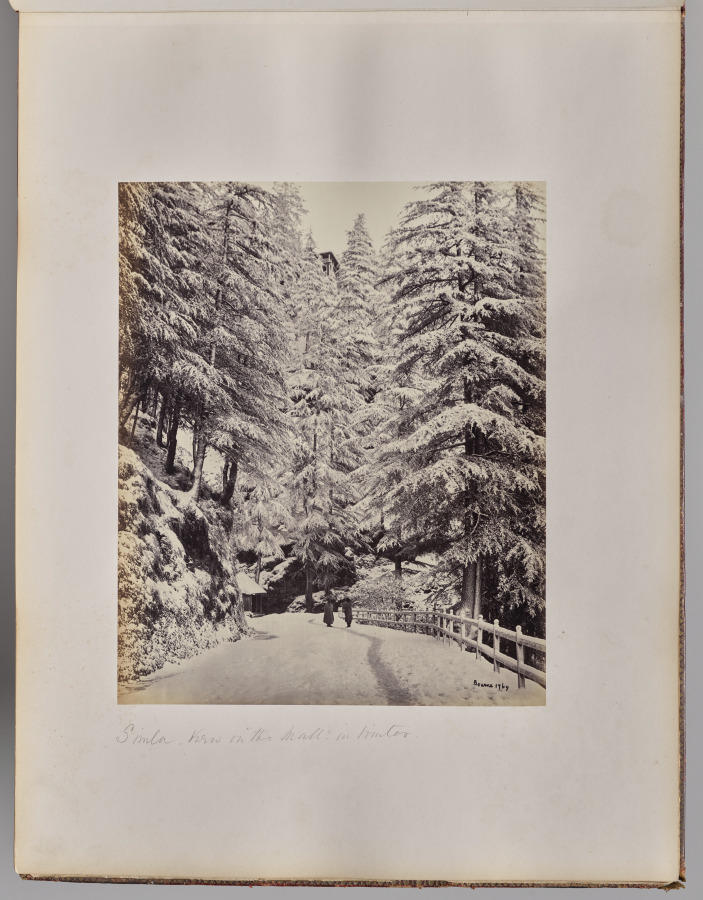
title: Shimla. View on the Mall in Winter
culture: England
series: Photographs of Northern India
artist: Samuel Bourne (British, 1834–1912)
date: 1863–70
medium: albumen print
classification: Photograph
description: The 50 images in this album, all taken in the 1860s, move from the hill towns of the Himalayas down to cities including Lahore (now in Pakistan), Delhi, Lucknow, Agra, Benares (now Varansi), and Calcutta (now Kolkata). Architectural studies of major monuments offer valuable historical records of what sites such as the Taj Mahal and the imperial mosque of the Mughal emperors in Delhi looked like before 20th-century restorations.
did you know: Samuel Bourne, the author of most the images in this album, was a banker in England before he moved to India to become a professional photographer.